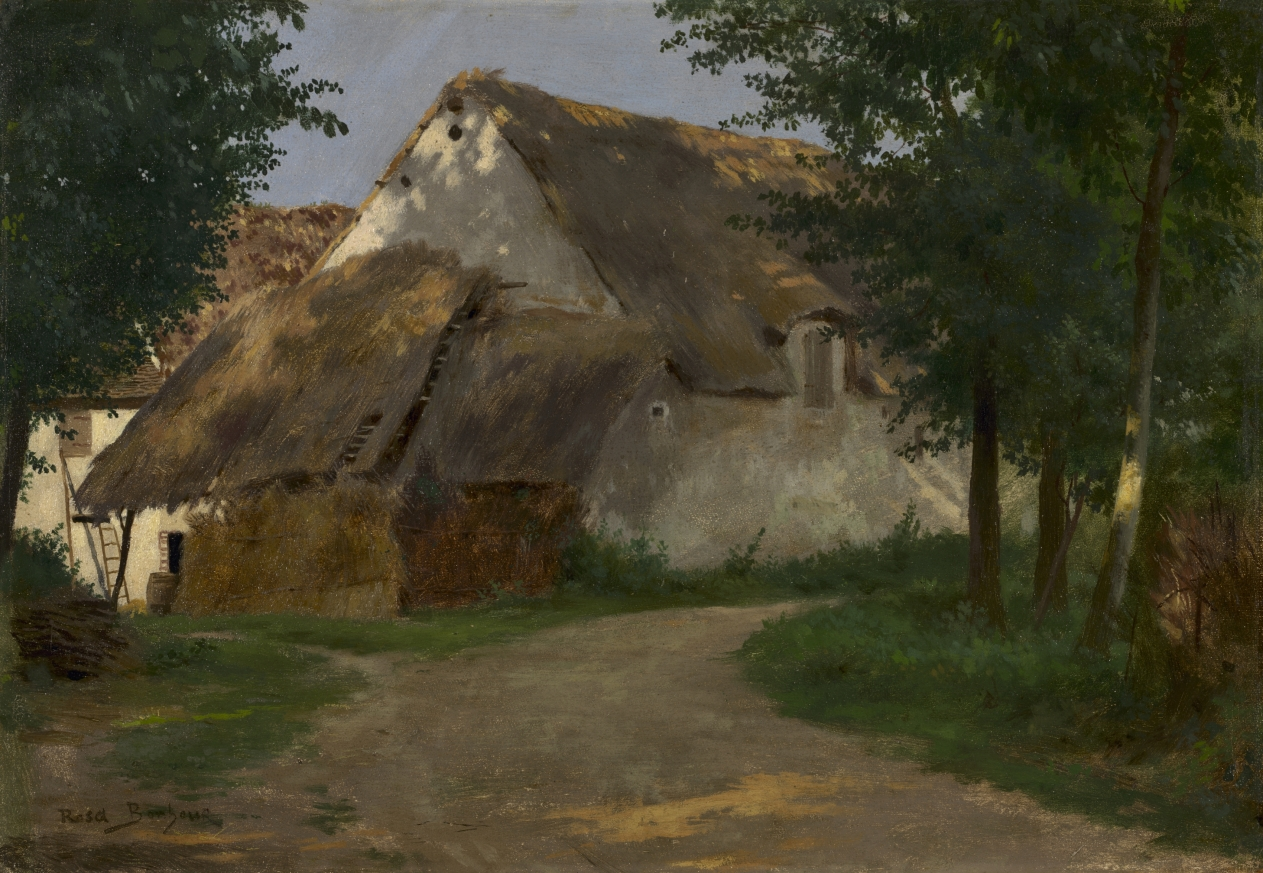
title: The Farm at the Entrance of the Wood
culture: France, 19th century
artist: Rosa Bonheur (French, 1822–1899)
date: 1860–80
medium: oil on fabric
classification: Painting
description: One of the most celebrated female artists of the 19th century, Bonheur established an international reputation by exhibiting at the Paris Salons. Empress Eug​é​nie, wife of Napoleon III, visited her studio to personally confer the Legion of Honor, making Bonheur the first woman to receive the award. This painting may have been inspired by the rustic houses in the vicinity of the Forest of Fontainebleau, where Bonheur lived for more than 40 years.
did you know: Bonheur's artistic work led her to pastures, fairs, and even slaughterhouses—unlikely places for a proper 19th- century lady. Long dresses were too cumbersome for her rugged lifestyle; in order to wear trousers on the job she had to seek permission from the local government.